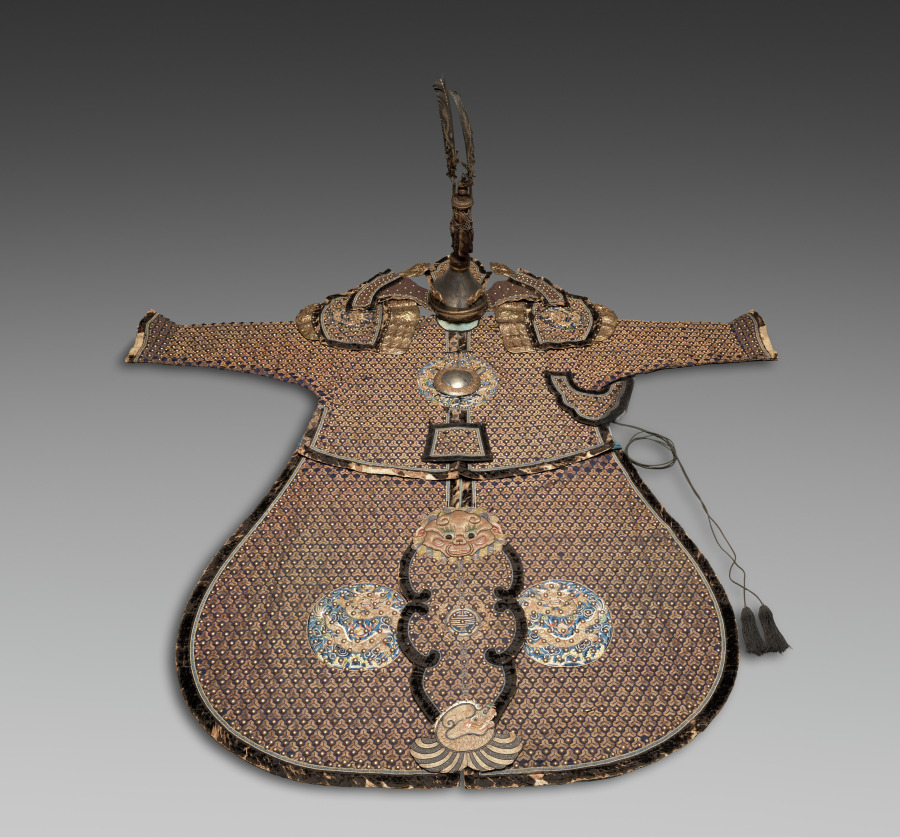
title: Ceremonial Uniform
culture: China, Qing dynasty (1644-1911)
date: 1644–1911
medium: satin weave silk with gold metal thread embroidery; supplementary weft; black velvet; metal (brass?); lined in blue silk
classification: Arms and Armor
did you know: The ceremonial uniform was considerably heavy; the jacket alone weighs 2.38 kg (5.25 lbs).